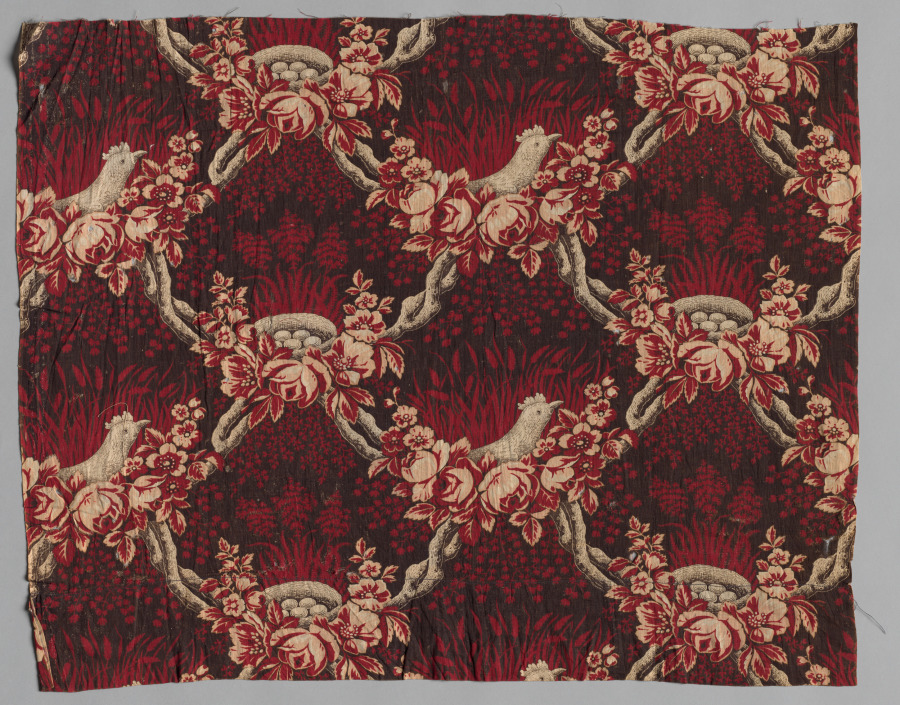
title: Roller Printed Cotton Textile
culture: America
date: 19th century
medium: plain cloth, roller printed: cotton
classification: Textile